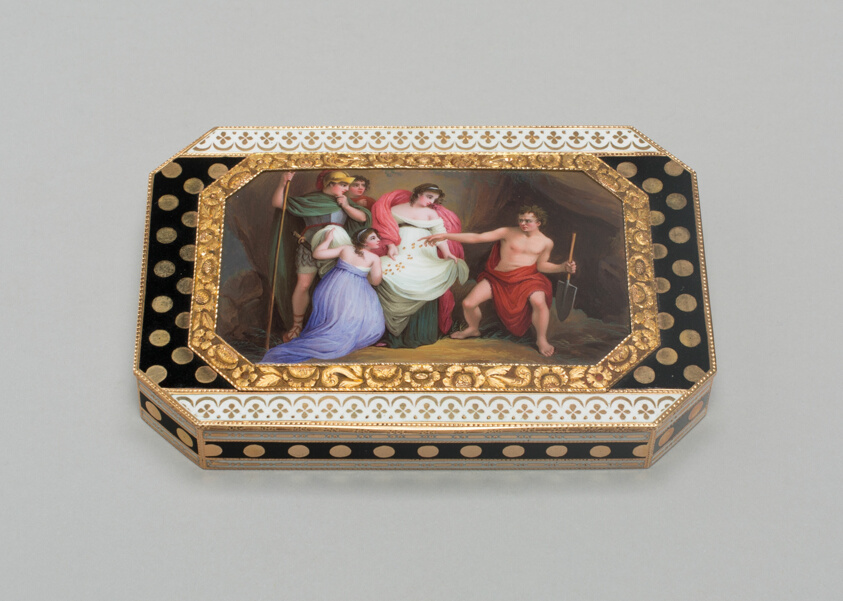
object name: Metalwork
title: Snuff Box with a Mythological Scene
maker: Geneva, Switzerland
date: c. 1814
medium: Gold and enamel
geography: Switzerland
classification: snuff box; european decorative arts; metalwork